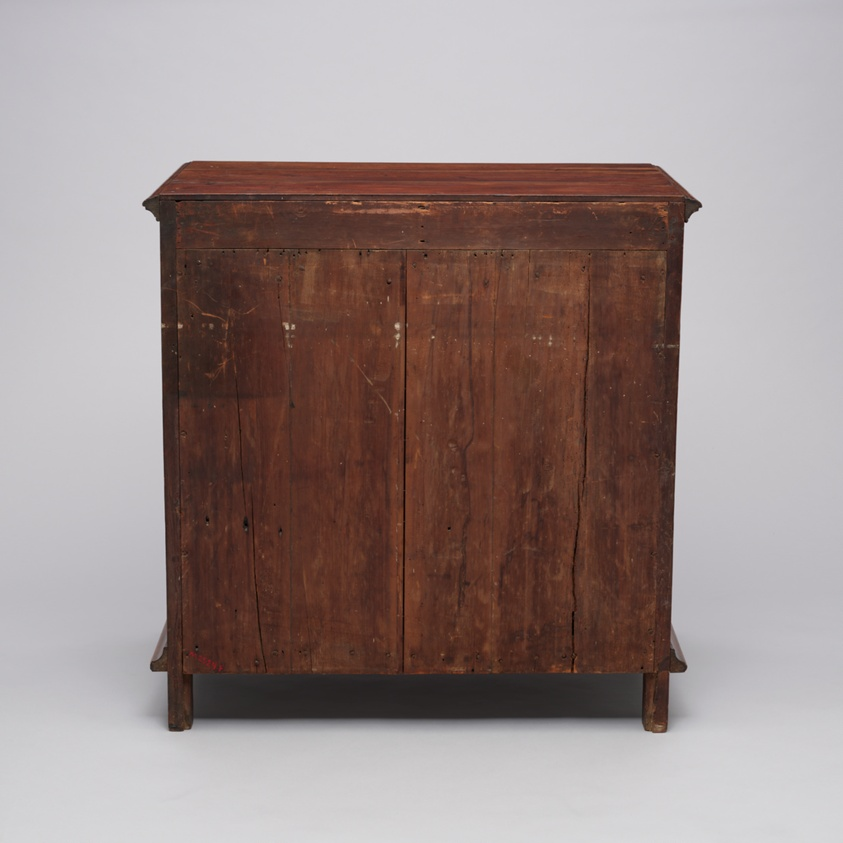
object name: Furniture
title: Chest of Drawers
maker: Artist unknown (American, 18th century); Pennsylvania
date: 1700–30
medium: Walnut, tulipwood, and pine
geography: Pennsylvania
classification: case furniture; furniture; american decorative arts; american arts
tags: furniture